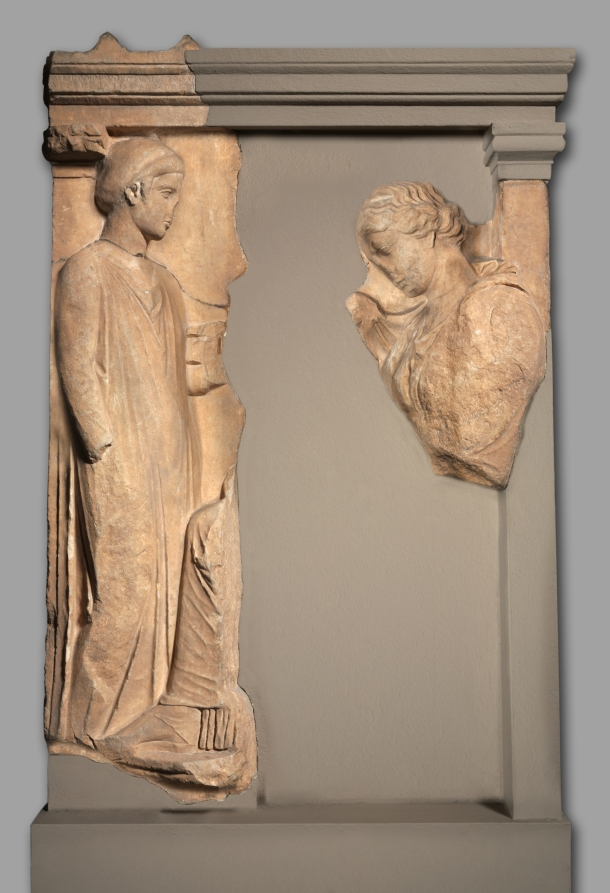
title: Grave Stele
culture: Greece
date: 400–350 BCE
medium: pentelic marble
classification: Sculpture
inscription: ...ΜΕΓΑΛΗΝ ΛΥΠΗΝ ΣΥ ΛΙΠΟΣΑ ΦΑΝ... ...ΔΕ ΣΕΠΩΙΚΤΙΣΕ ΜΟΙΡΑ ΠΟΘΕΙ...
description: Carved in high relief, the original composition of this Attic grave marker can be reconstructed by comparison with more complete examples elsewhere (such as the Stele of Hegeso in Athens [National Archaeological Museum, 3624]). The standing figure at left likely represents a maid or servant, her hair mostly contained within a sakkos (haircloth). Holding a pyxis (small container) in her left hand, she approaches the more fragmentary seated figure at right. This woman, draped and casting her eyes downward, represents the deceased, perhaps Phanostrate, as one scholar has restored the partial name Phan... inscribed in the fragmentary epigram on the preserved portion of the lintel.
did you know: The fragmentary seated woman at right represents the deceased.